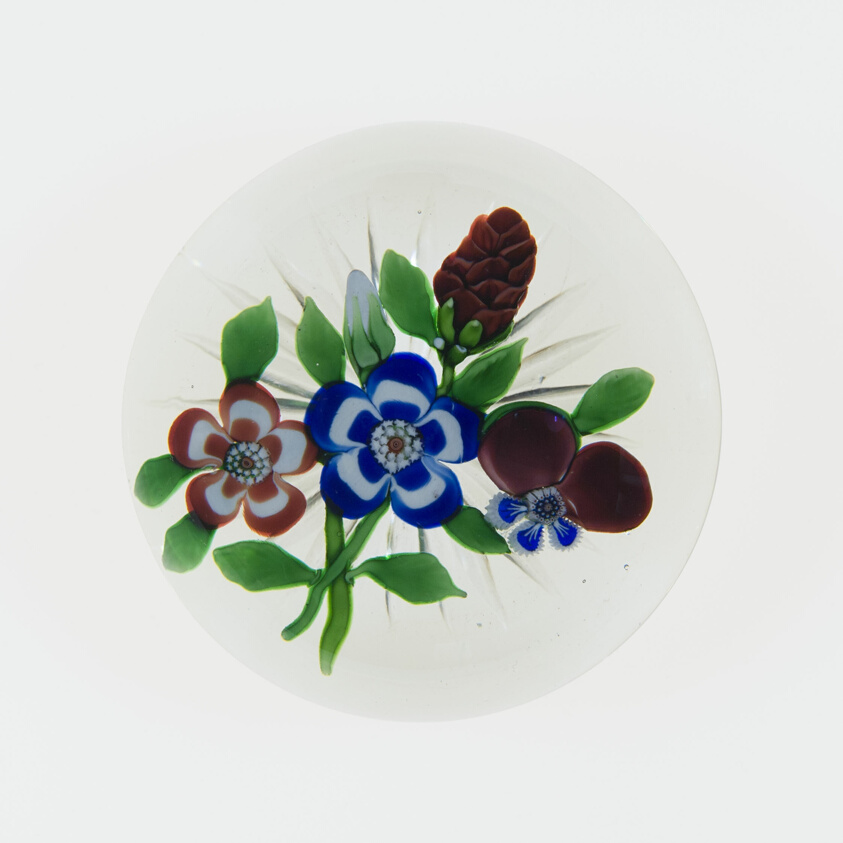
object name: Glass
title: Paperweight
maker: Baccarat Glassworks (Cristalleries de Baccarat); Lorraine, France, founded 1764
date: c. 1848–55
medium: Glass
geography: Lunéville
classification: paperweight; lampwork; european decorative arts; glass